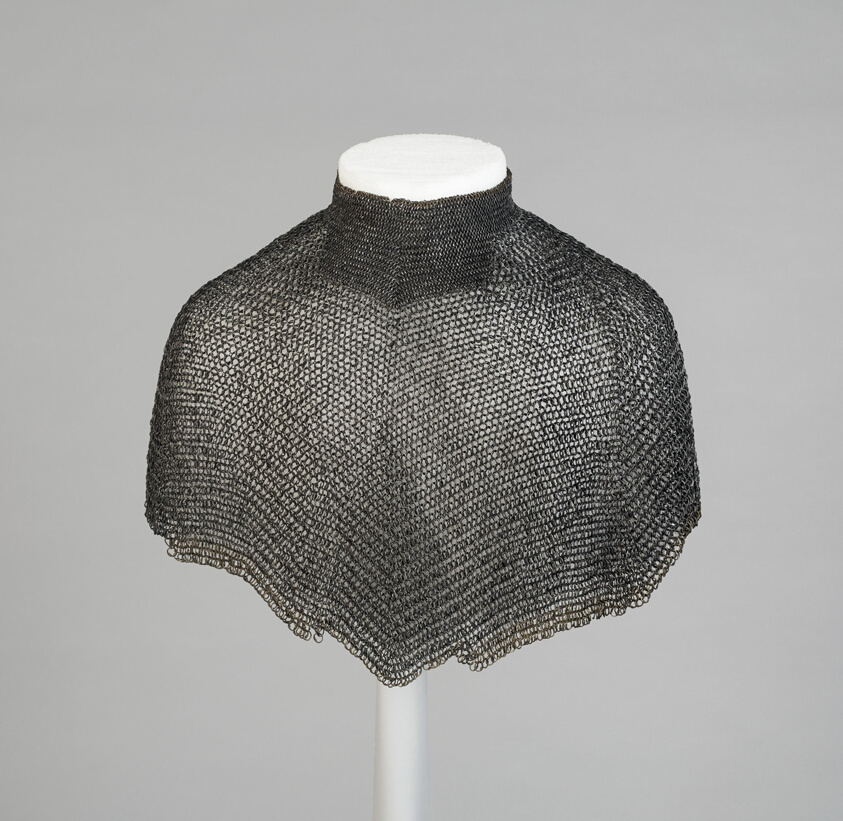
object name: Armor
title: Mail Cape (Bishop's Mantle)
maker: German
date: 1520/70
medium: Steel and brass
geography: Germany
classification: suit-element; armor; arms and armor